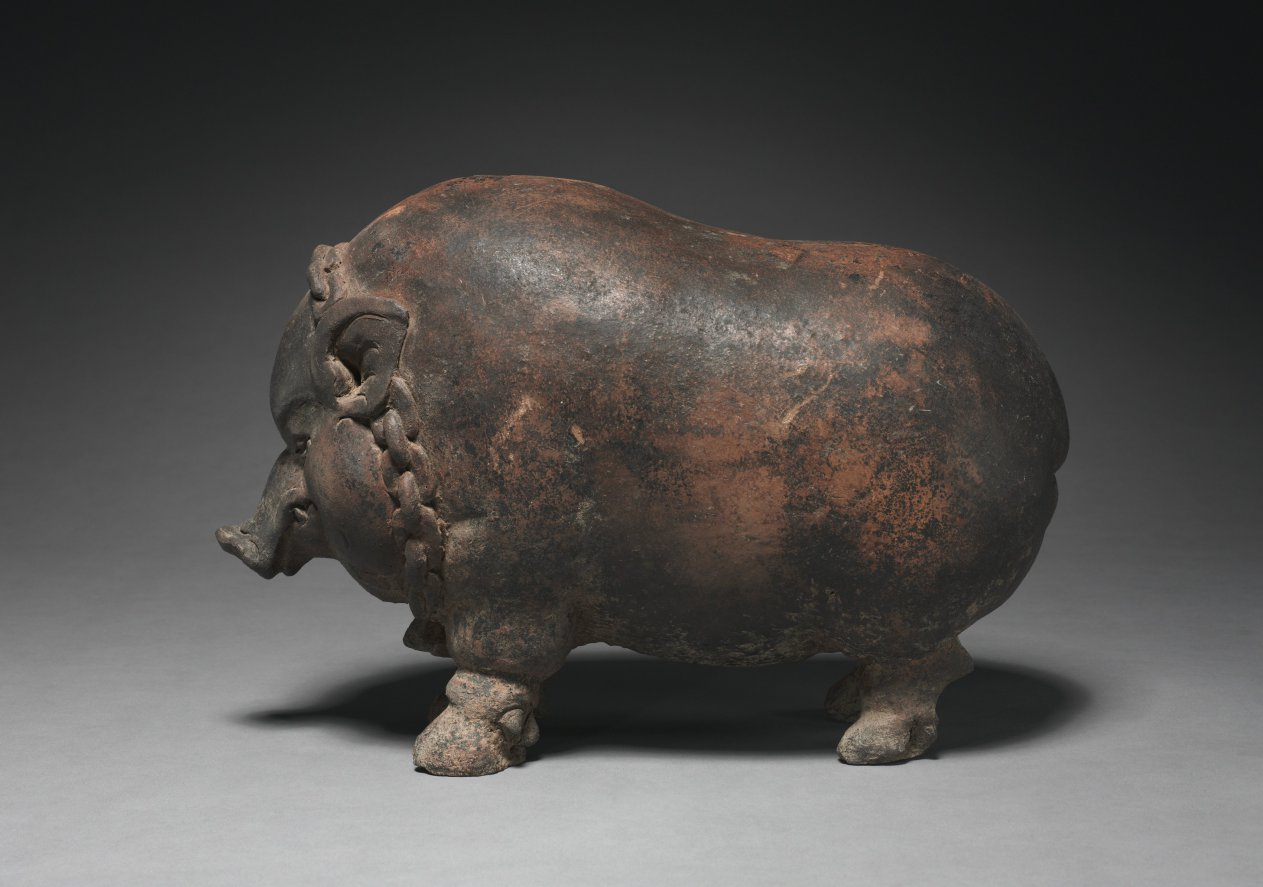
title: Piggy Bank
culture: Java, Majapahit Dynasty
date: 1300s–1400s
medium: terracotta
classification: Sculpture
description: Do I look familiar to you? My round and exaggerated form makes me perfect for storing precious coins, which could be inserted through the slot (now closed) on the hump of my back. My fierce expression is a warning to scare off any burglars, and the padlock and chain around my neck indicate my function as a personal bank. Yes, I am a piggy bank—a lucky one that has survived intact for over 500 years! Usually we end up broken by people who want our coins.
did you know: The word for piggy bank in Eastern Java is tjèlèngan, meaning ‘wild boar.’